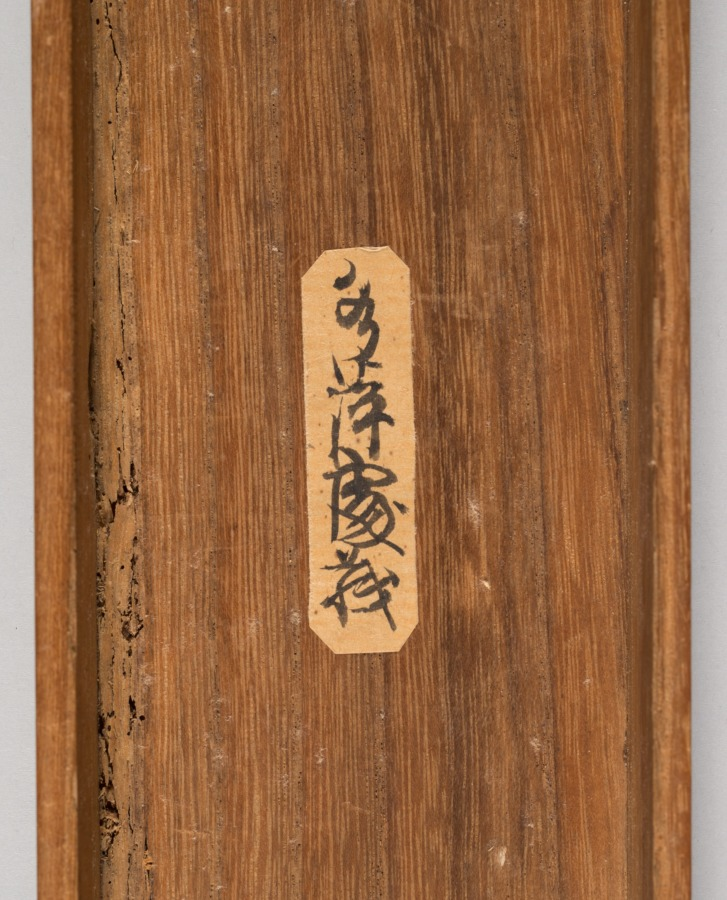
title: A Samurai on Horseback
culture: Japan, Edo period (1615–1868)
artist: Kusumi Morikage (Japanese, active c. 1620–1690)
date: mid- to late 1600s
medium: hanging scroll; ink and slight color on paper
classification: Painting